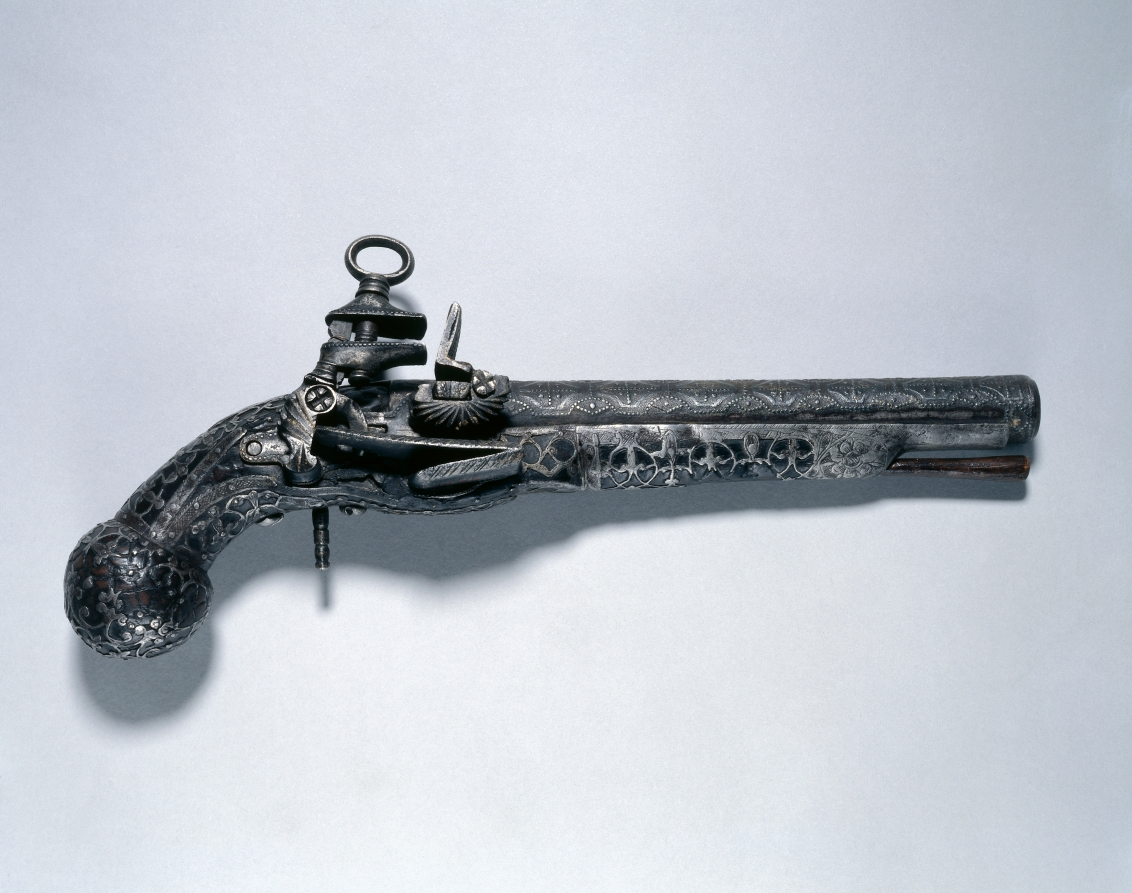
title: Snaphance Pistol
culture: Spain, Ripoll, 17th century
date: 1600s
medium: steel, ebony with silver inlay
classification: Arms and Armor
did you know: A snaphance pistol is a type of barrel-loading, flintlock gun. The snaphance is a spring-lock mechanism used for discharging a flint. This innovation greatly improved the efficiency of getting a shot off.